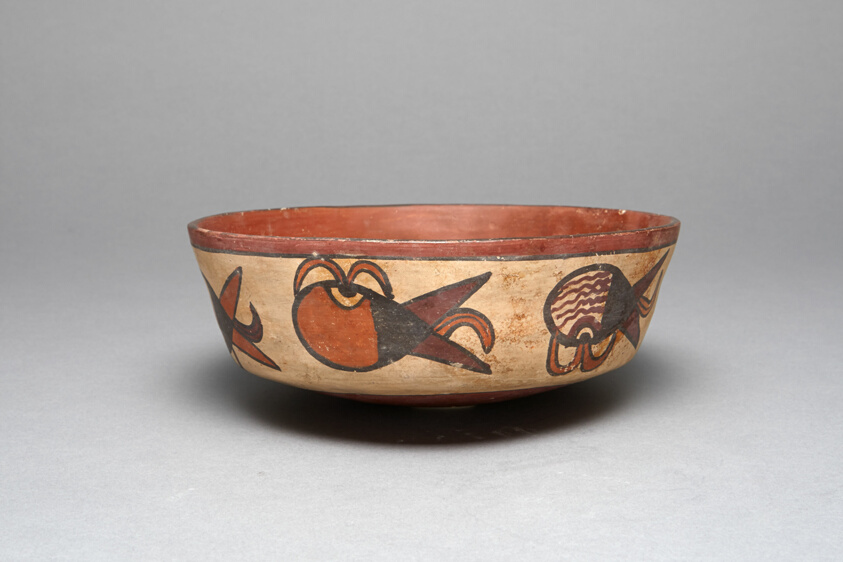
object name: Vessel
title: Bowl Depicting Abstract Motifs, Possibly Representing Sprouting Seeds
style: nazca, early intermediate period, Pre-Columbian, americas, Arts of the Americas, andean, andes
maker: Nazca; South coast, Peru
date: 180 BCE–500 CE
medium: Ceramic and pigment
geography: Peru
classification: bowl; earthenware; art of the americas; ceramics; vessel